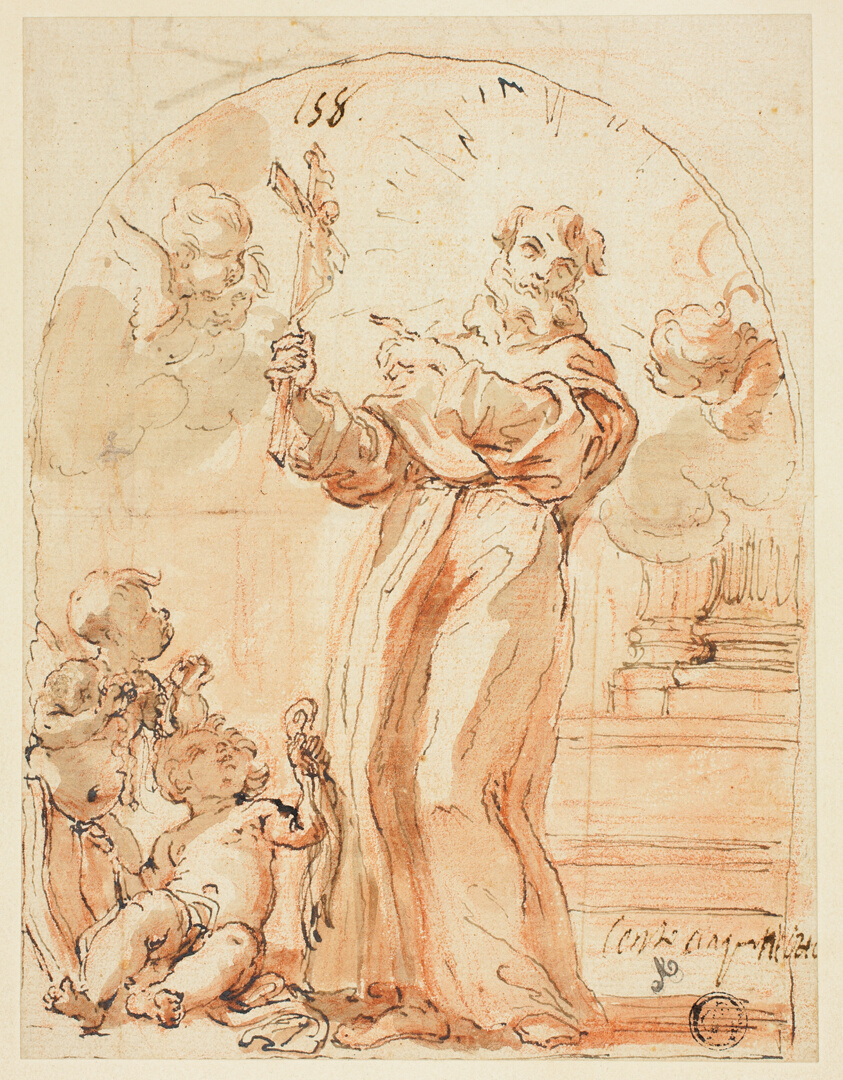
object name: Drawing and Watercolor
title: Standing Franciscan Saint Holding Crucifix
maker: Attributed to Giovanni Battista Gaulli (Italian, 1639-1709); or possibly Giovanni Battista Tiepolo (Italian, 1696-1770); or possibly the circle of Giuseppe Passeri (Italian, 1654-1714)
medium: Pen and brown ink, with brush and brown wash, and red chalk and red chalk wash, on ivory laid paper, laid down on ivory wove board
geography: Italy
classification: ink or chalk wash; drawings (visual works); prints and drawing